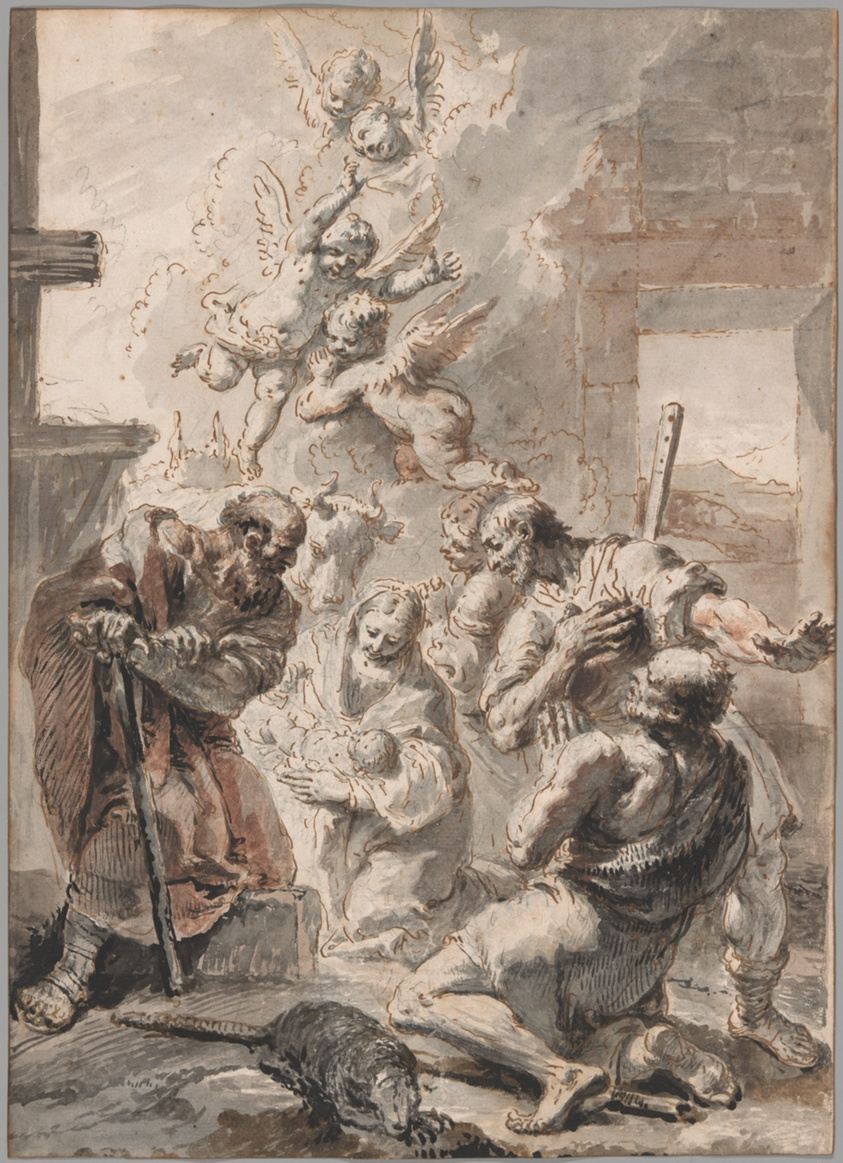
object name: Drawing and Watercolor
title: Adoration of the Shepherds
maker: Francesco Fontebasso (Italian, 1707–1769)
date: c. 1750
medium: Pen and brown ink and brush and black ink, with black and red ink washes, over black chalk, on ivory laid paper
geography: Italy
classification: drawings (visual works); brush and ink; paper; pen and ink drawings; prints and drawing